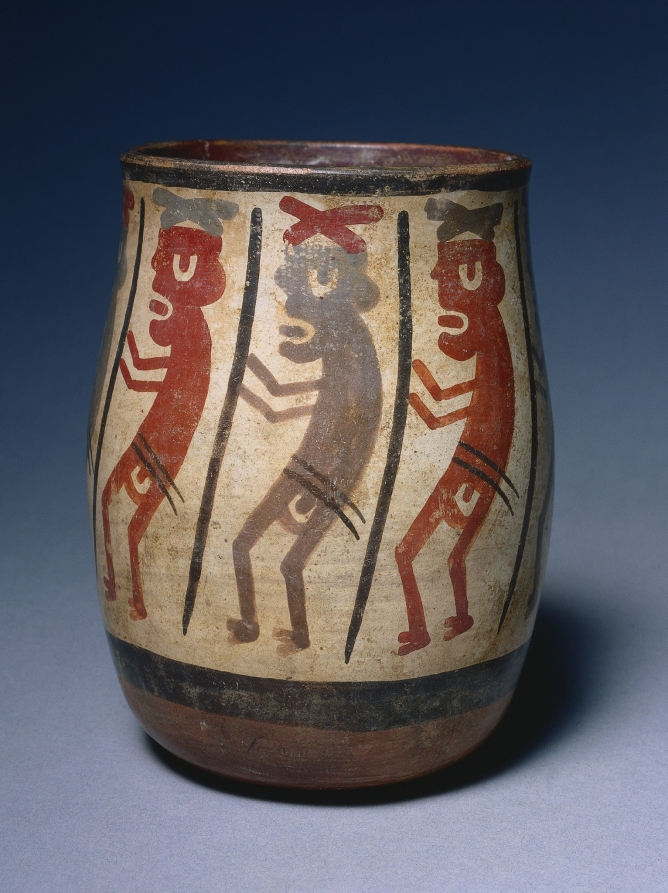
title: Vase with Procession of Warriors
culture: Peru, South Coast, Nasca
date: c. 350–600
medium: earthenware with colored slips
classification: Ceramic